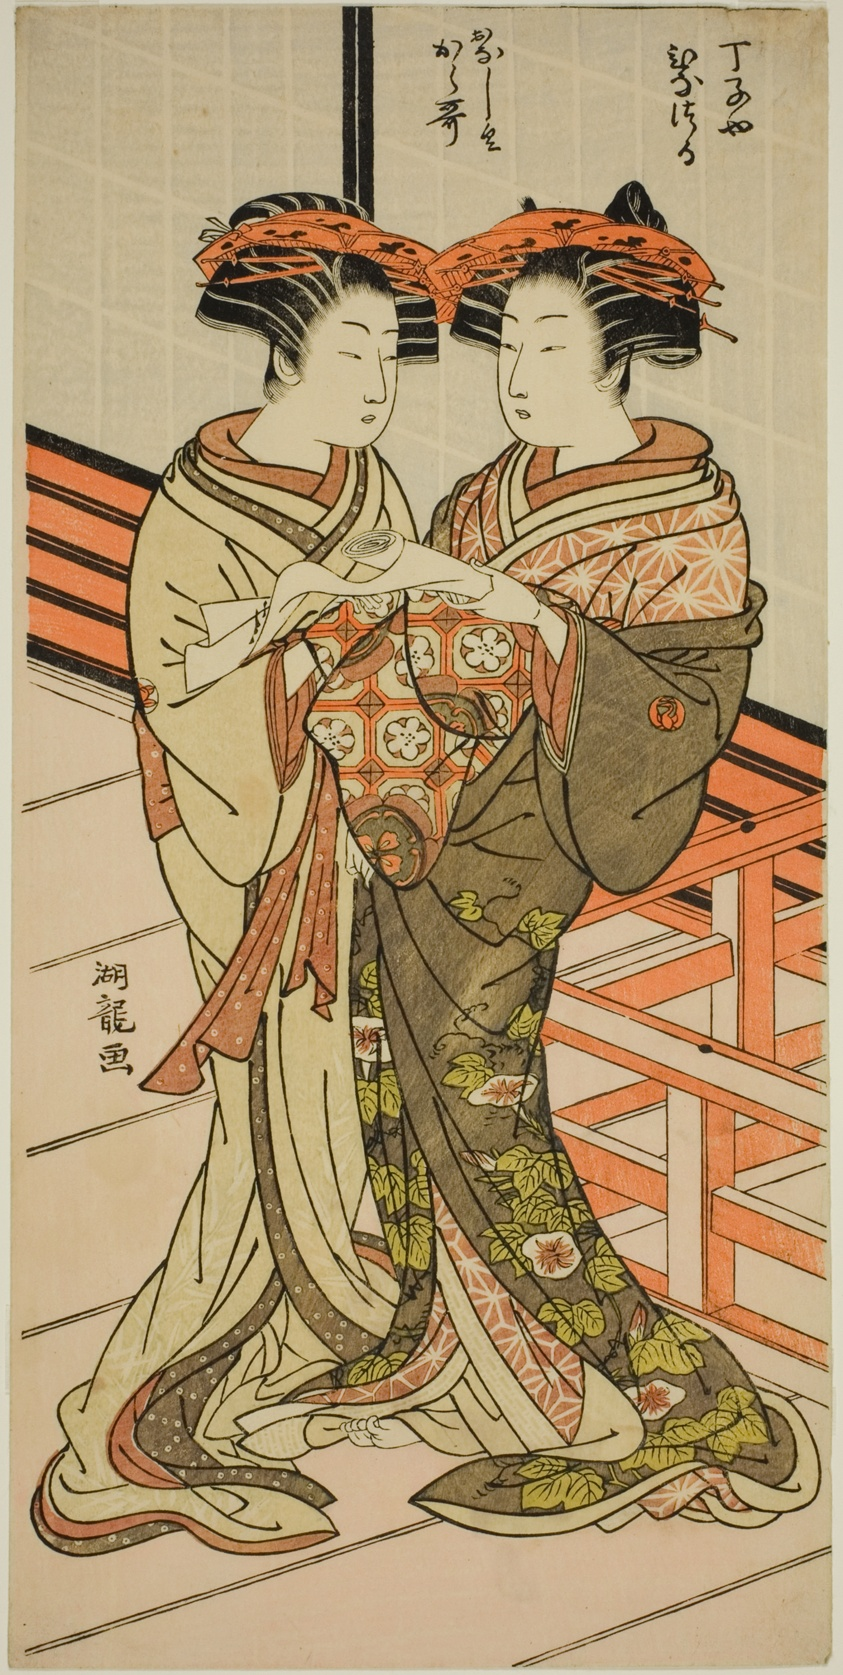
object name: Print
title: The Courtesans Hinazuru and Karauta of the Chojiya Holding a Letter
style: Japanese (culture or style)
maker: Isoda Koryusai (Japanese, 1735-1790)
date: c. 1776/81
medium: Color woodblock print; hosoban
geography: Japan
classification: woodblock print; print; asian art